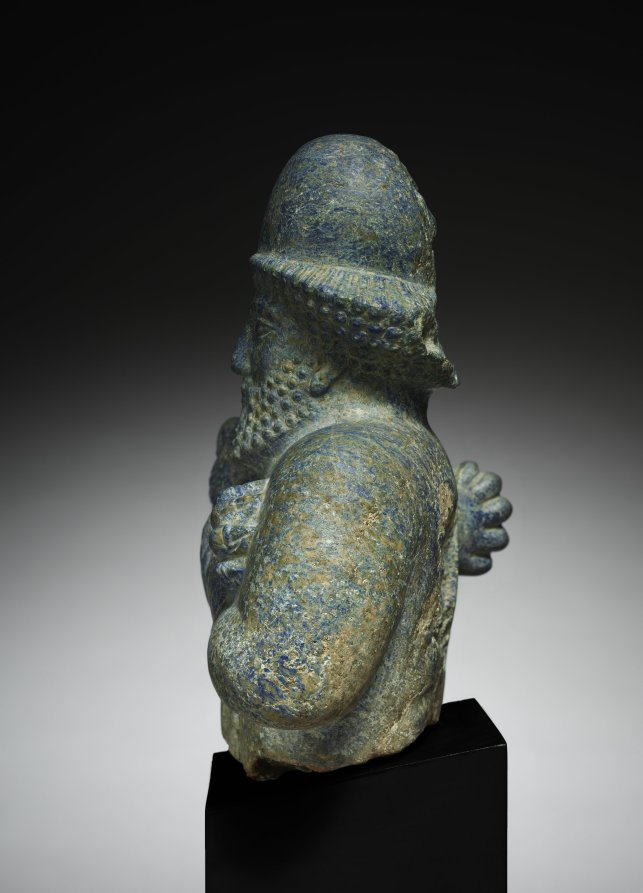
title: Median Lion Strangler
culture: Iran, Achaemenid (550–330 BCE)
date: 500–450 BCE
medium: lapis lazuli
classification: Sculpture